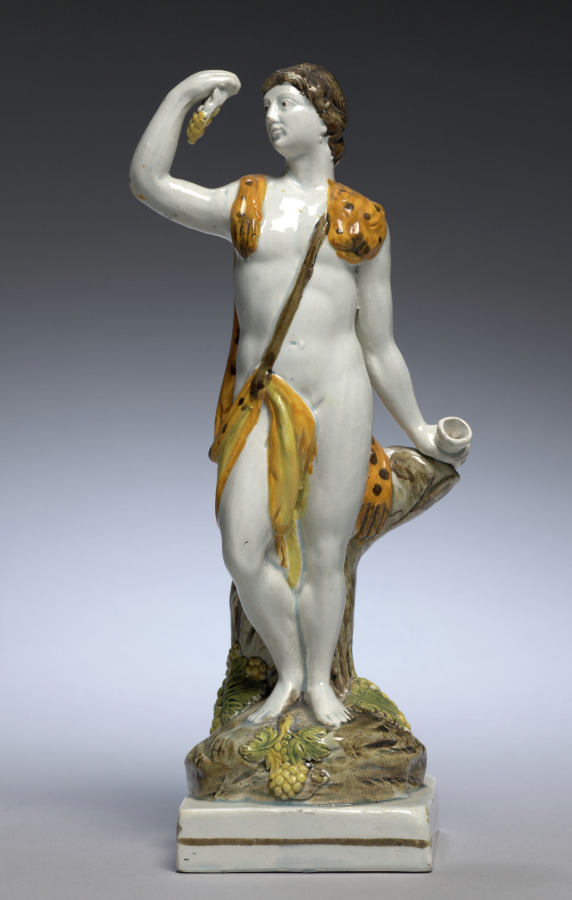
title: Bacchus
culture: England, Staffordshire, Pratt ware, late 18th-early 19th Century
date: c. 1800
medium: earthenware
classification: Ceramic